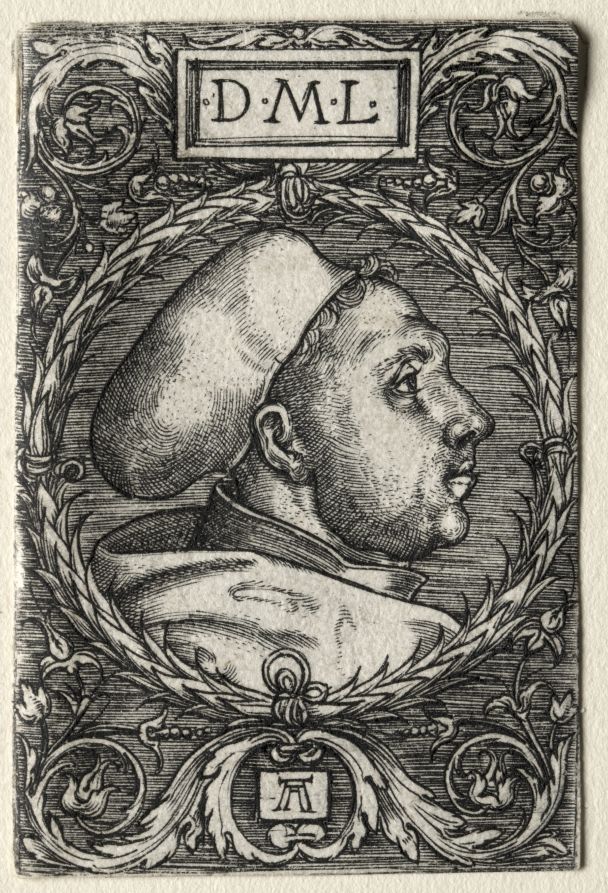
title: Martin Luther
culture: Germany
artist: Albrecht Altdorfer (German, c. 1480–1538)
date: ca. 1525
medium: engraving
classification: Print